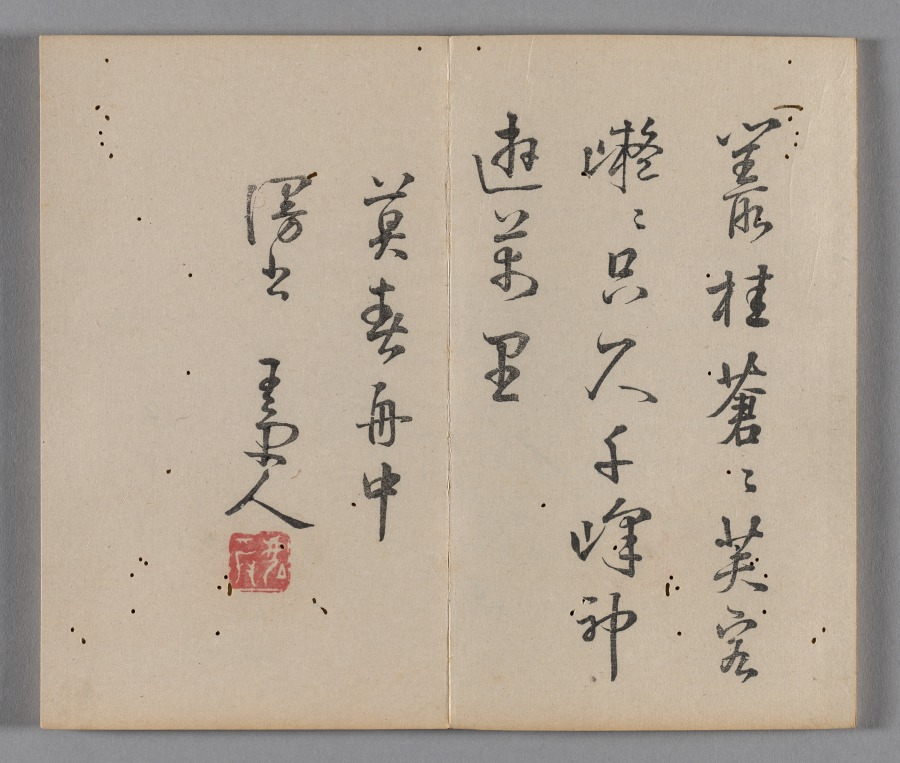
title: Ten Bamboo Studio Painting and Calligraphy Handbook (Shizhuzhai shuhua pu): Miscellaneous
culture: China, Qing dynasty (1644-1911)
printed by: Hu Zhengyan (Chinese, c. 1584–1674)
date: 1633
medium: Woodblock-printed book; ink and colors on paper; first edition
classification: Print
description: Color printing reached a level of perfection in the early 1600s, as seen in this Ten Bamboo Studio Collection of Calligraphy and Painting and the Mustard Seed Garden Manual of Painting (printed 1679 and 1701). The painterly quality, precision in registering (aligning) the woodblocks, and harmonious colors made them the most successful color print editions in Chinese history. Both editions were printed and compiled in Nanjing, spread nationwide, and had a great impact on the arts in Japan and Korea.